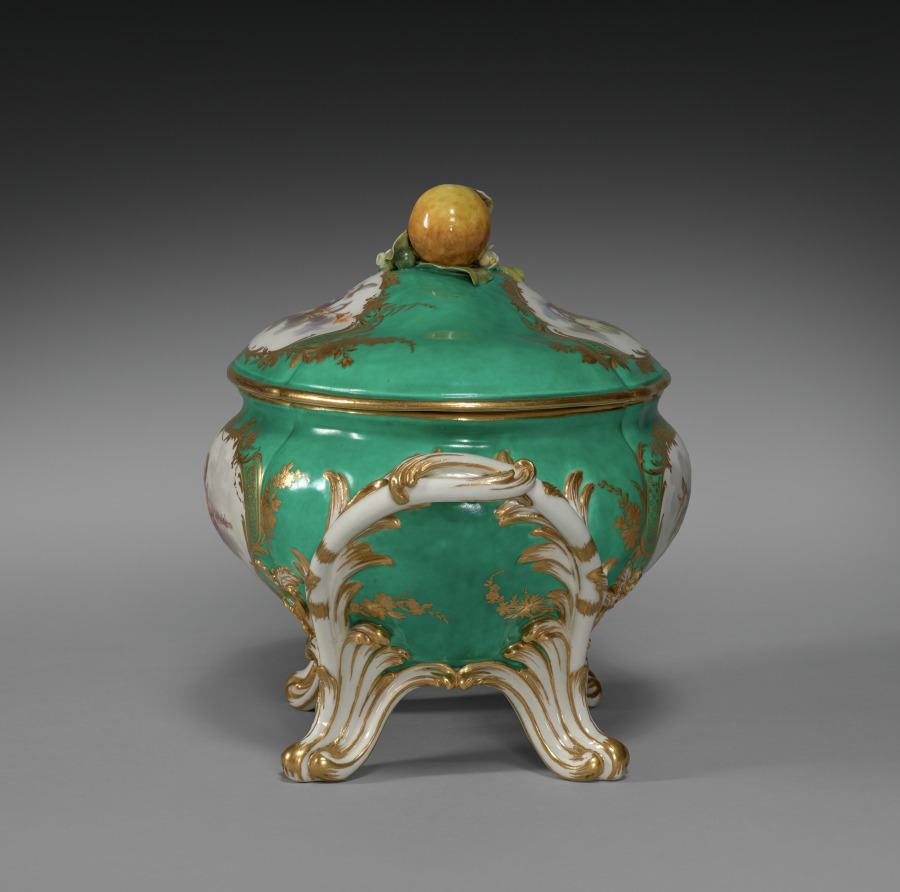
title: Covered Tureen (Terrine du roi)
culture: France, Sèvres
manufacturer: Sèvres Porcelain Factory (French, est. 1756)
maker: attributed to Charles Nicolas Dodin (French, 1734–1803)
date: 1756–57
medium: soft-paste porcelain with enamel and gilt decoration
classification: Ceramic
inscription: [Interlaced L's]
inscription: [Date letter 'D' (in cursive with a dot on either side)]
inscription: [Incised 'b']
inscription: [Incised '6']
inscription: [Inventory numbers in red enamel]: "r.u./710" [base of tureen]; "r.u./710a" [on lid]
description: This tureen’s striking green background, or fond vert, was a major advancement for the Sèvres Porcelain Factory, known for their innovation in and mastery of color. Traditionally the largest, most expensive item in an 18th-century French dinner service, this tureen was part of a porcelain dining set presented to King Frederick V of Denmark by French King Louis XV in 1758.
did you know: French King Louis XV was a great patron of the decorative arts; he acquired the Sèvres Porcelain Factory in 1759.